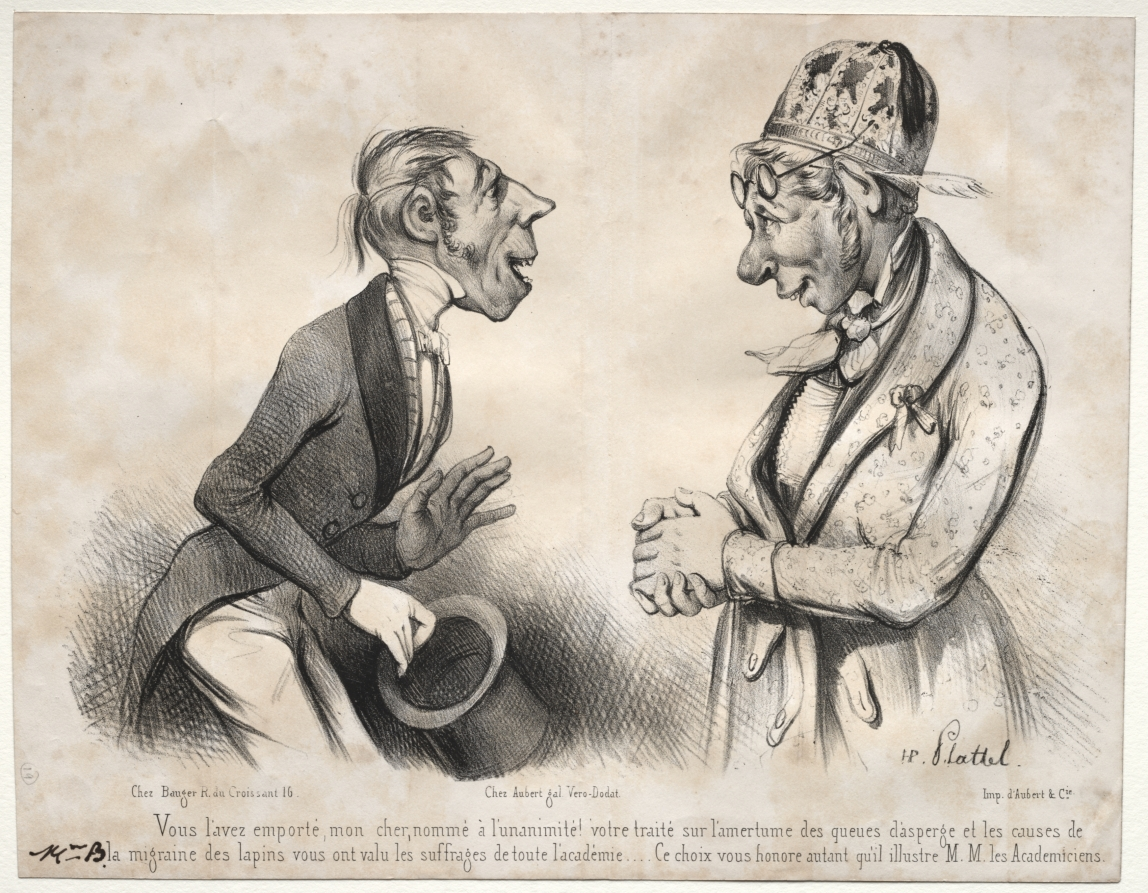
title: Vous l'avez emporté, mon cher, nommé à l'unanimite!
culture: France, 19th century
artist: Jules Platier (French)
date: 1800s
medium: lithograph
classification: Print